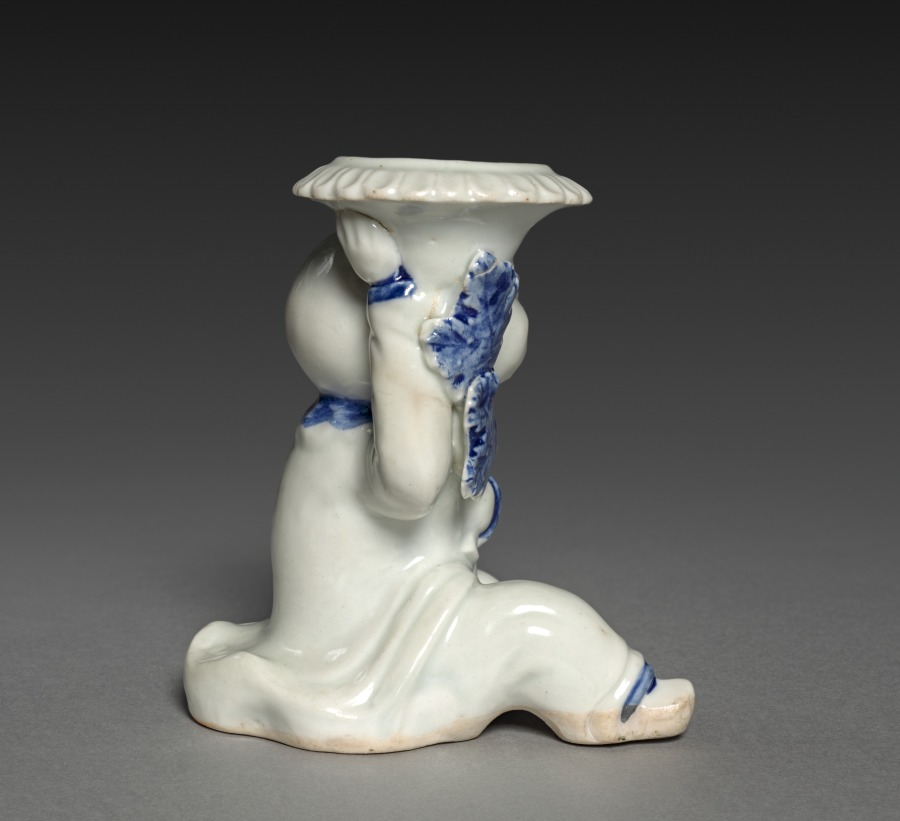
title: Kneeling Boy Holding a Vase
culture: Japan, Edo period (1615–1868)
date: 1700s-1800s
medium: porcelain, molded and carved, with underglaze blue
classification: Ceramic